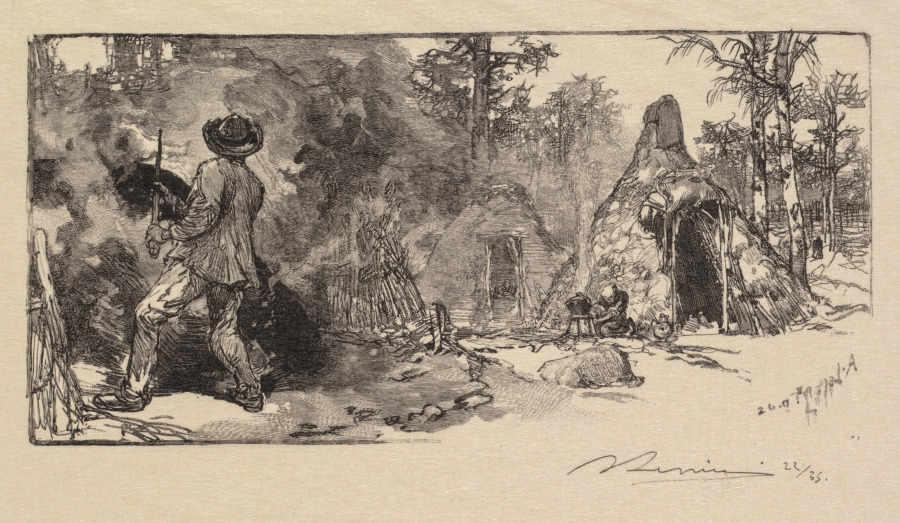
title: Fontainebleau Forest: Coalmen (La Forêt de Fontainebleau: Les Charbonniers)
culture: France, 19th century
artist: Auguste Louis Lepère (French, 1849–1918)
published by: A. Desmoulins, Published in Revue Illustrée, 1887–90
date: 1890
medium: wood engraving from bound volume of 34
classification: Bound Volume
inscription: Below image, lower right, in black ink: ALepère 22/35; on window mat, lower right, in graphite: Les Charbonniers; in block, within image, lower right: 26.g789 (undecipherable numbers) A